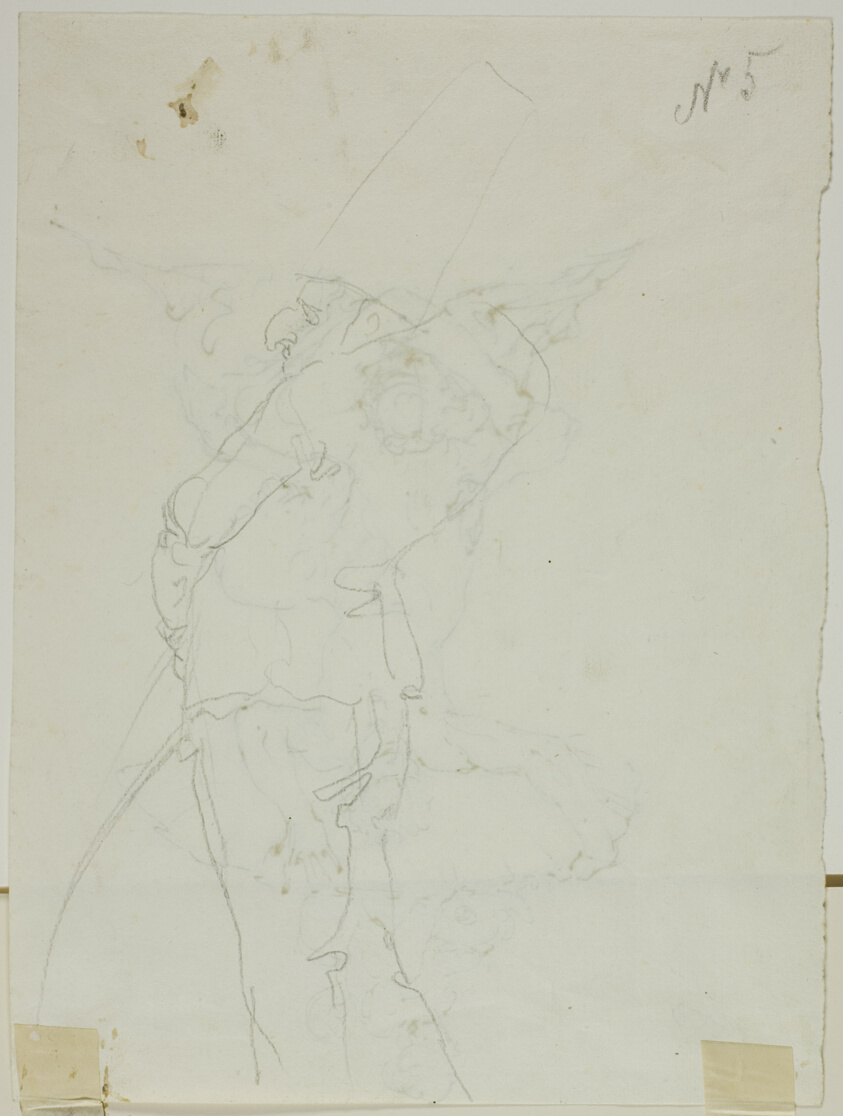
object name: Drawing and Watercolor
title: Fountain with Satyr and Putto (recto); Punchinello (verso)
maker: Unknown artist; Italian or French, 18th century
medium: Pen and brown ink, over graphite (recto), and graphite (verso), on ivory laid paper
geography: Italy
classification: pen and ink drawings; drawings (visual works); prints and drawing